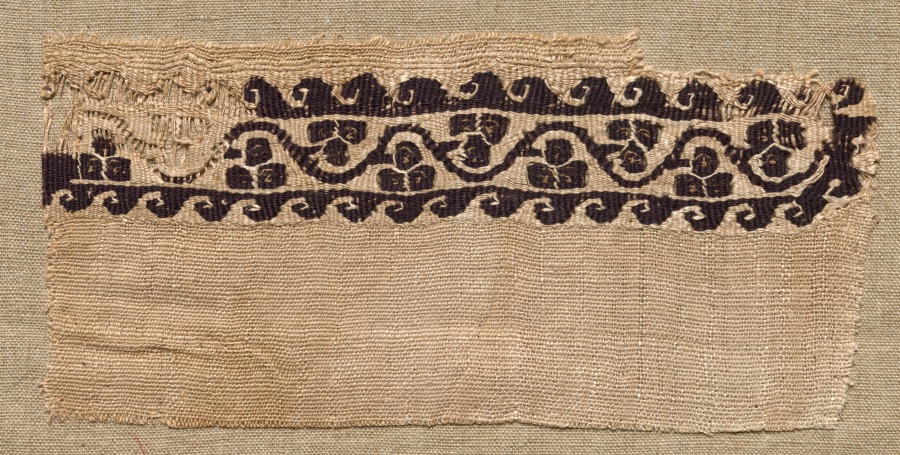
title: Fragment, with Part of a Clavus, from a Tunic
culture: Egypt, Byzantine period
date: 400s - 500s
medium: tabby with inwoven tapestry ornament, wool and linen on linen ground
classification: Textile